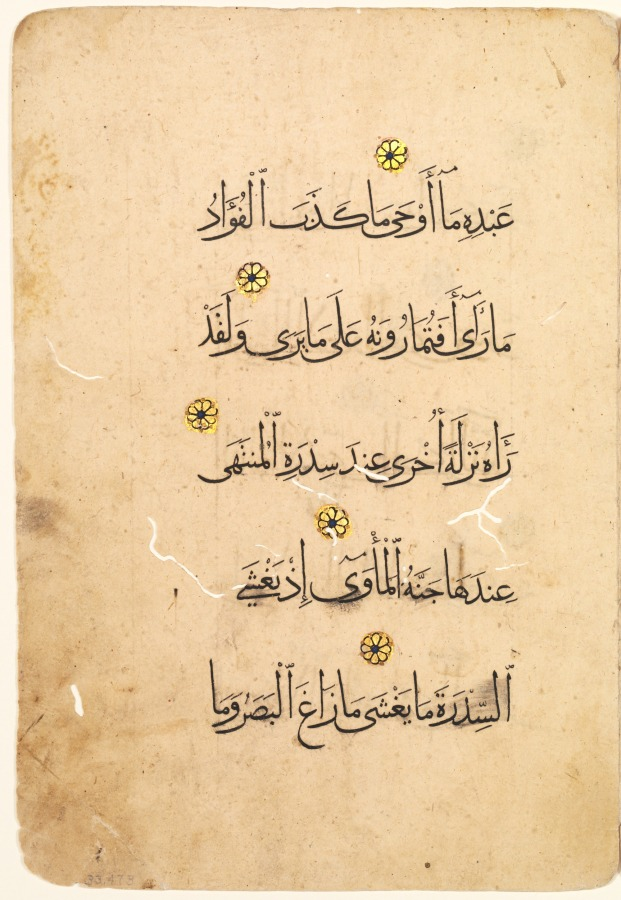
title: Qur'an Manuscript Folio (recto; verso) [Right side of Bifolio]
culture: Egypt, Mamluk sultanate (1250–1517)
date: 1300s–1400s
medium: ink, gold, and colors on paper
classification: Drawing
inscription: Sura al-Najm [Chapter:The Star] 53: part 10-part 17 (Arabic) Muhaqqaq (five lines to a page)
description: It is through the Arabic language that the Qur’an was revealed to the Prophet Muhammad in the 600s. As a result, calligraphy is celebrated as the highest form in Islamic art. The verses (ayat) written here come from the 53rd chapter (surah) of the Qur’an, also known as the Surah An-Najm, the Chapter of the Star. The significance of the Qur’an provides an explanation for the importance of calligraphy, but its use was not restricted to religious texts. Many objects in the museum's Islamic collection bear calligraphic inscriptions and come from secular contexts, displaying the versatility and creativity of this art form.